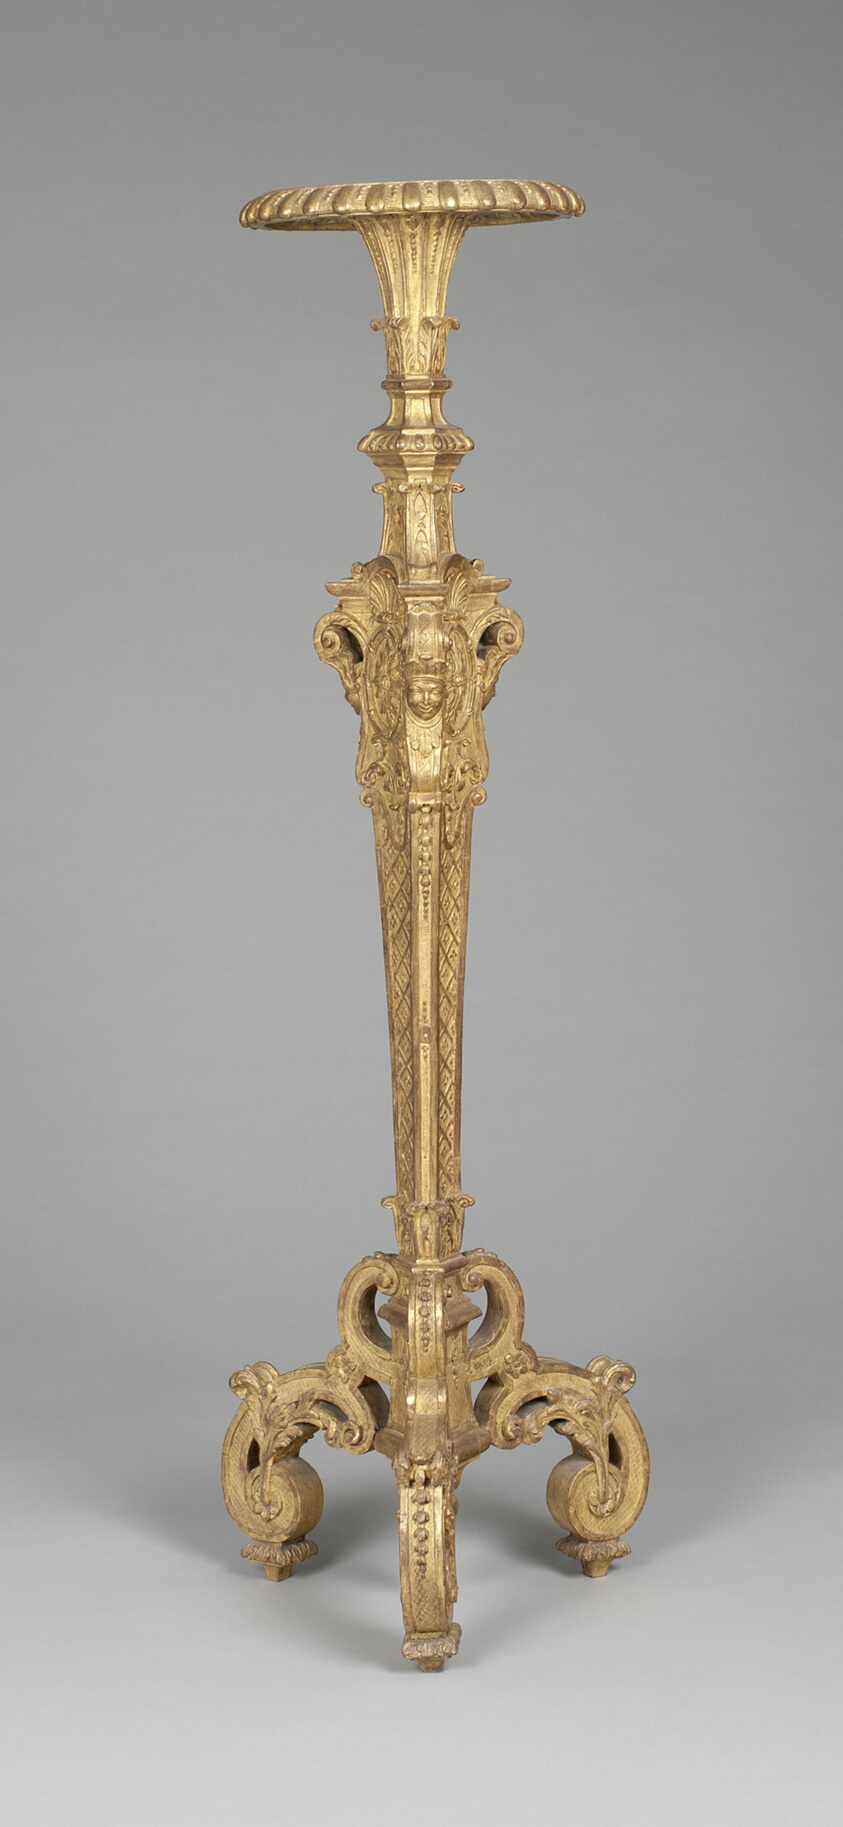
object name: Furniture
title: Stand for Candelabrum (Torchère)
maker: France, Paris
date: 1685/90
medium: Carved, gessoed, and gilded oak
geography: France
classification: torchère (stand); stand; lighting device; furniture; european decorative arts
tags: furniture